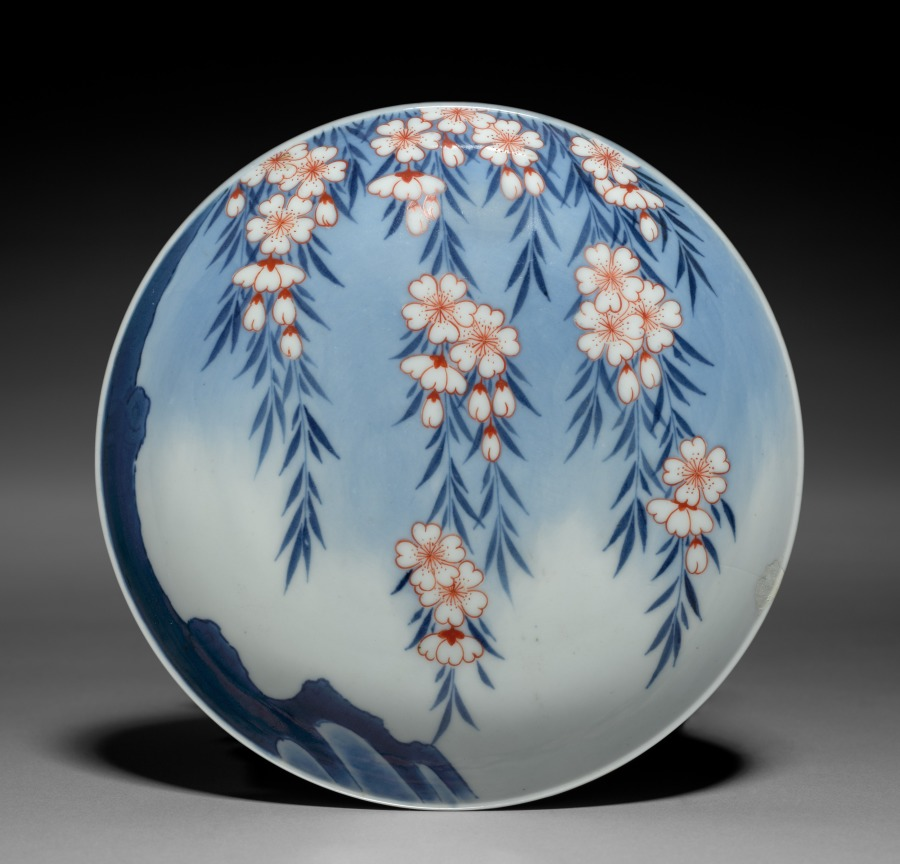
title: Dish with Weeping Cherry Tree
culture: Japan, Meiji period (1868–1912)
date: late 1800s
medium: Porcelain with underglaze blue and overglaze red enamel (Hizen ware, Nabeshima type)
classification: Ceramic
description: This dish depicts a cherry tree (sakuragi) whose flower-laden branches are the centerpiece while the sliver of a trunk and roots appear on the left edge. The sakura blossoms are delicately depicted in an iron-red overglaze. The flowers’ various positions (facing out and downward) and stages of maturity (bud and full bloom) enhance the naturalism and dynamism of the image.